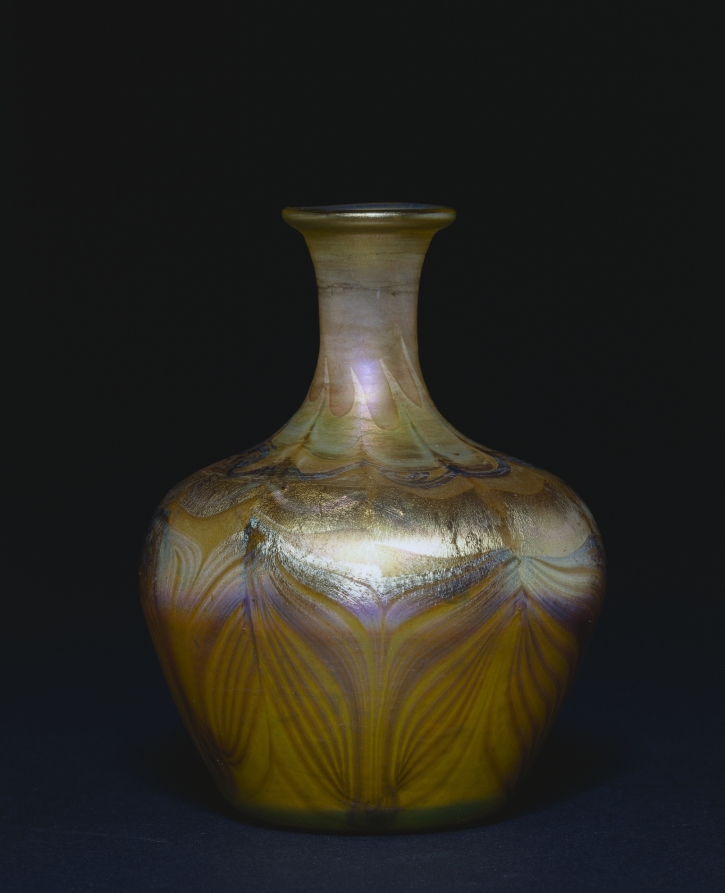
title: Vase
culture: America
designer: Louis Comfort Tiffany (American, 1848–1933)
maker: Tiffany Studios (United States, New York, 1902–32)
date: c. 1905–10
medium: favrile glass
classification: Glass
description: This small vase is made of Louis Comfort Tiffany's signature Favrile glass. Early on when Tiffany began collaborating with glass artists on new types of production, his aesthetic ambitions were realized in the development of Favrile glass, deliberately named to sound French, expensive, and “handmade.” Largely through Tiffany's marketing ability, Favrile glass became America’s greatest contribution to the Art Nouveau style. His works were exhibited at international expositions; galleries in major European cities, where his creations were bought by many museums; and in his store in Manhattan, known as the Tiffany Glass and Decorating Co., later Tiffany Studios. Along with the many shapes and sizes of his decorative vases, Tiffany used Favrile glass in mosaic panels, stained glass windows, and his artistic line of table and floor lamps.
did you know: Benjamin Hubbell, the architect of the Cleveland Museum of Art, acquired this vase from Louis Comfort Tiffany, with whom he collaborated on various projects.